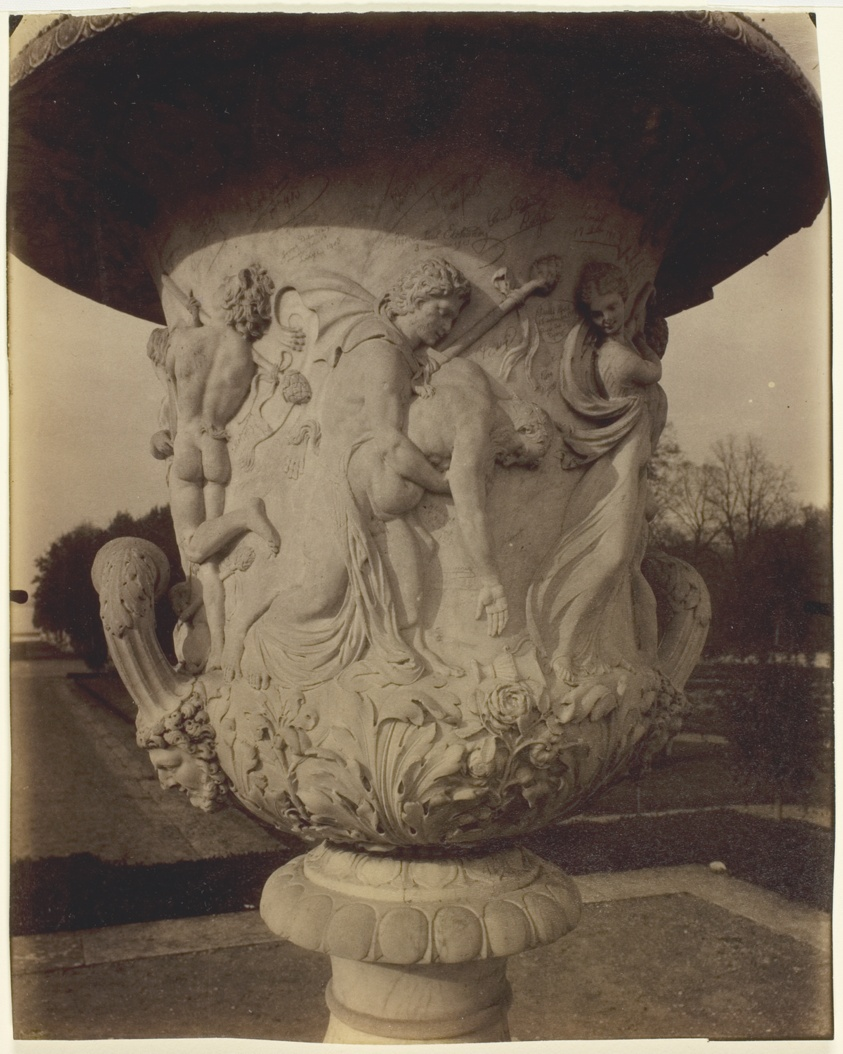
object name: Photograph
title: Versailles, Vase par Cornu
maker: Jean-Eugène-Auguste Atget (French, 1857–1927)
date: 1904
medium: Albumen print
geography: France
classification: albumen silver print; photographic process; photography; photograph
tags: Collected by Hugh Edwards